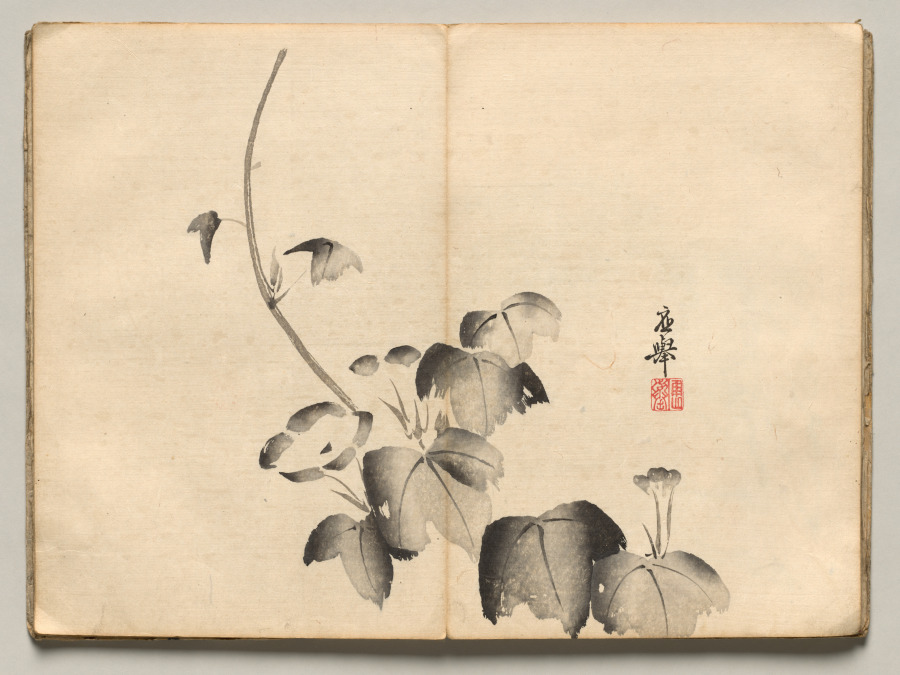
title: Morning Glory from Ōkyo Picture Book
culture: Japan, Edo period (1615–1868)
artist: after Maruyama Ōkyo (Japanese, 1733–1795)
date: 1850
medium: accordion-style woodblock printed folding-book; ink and color on paper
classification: Bound Volume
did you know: This impression of a book of woodblock-printed designs is missing a spread that depicts a crane.